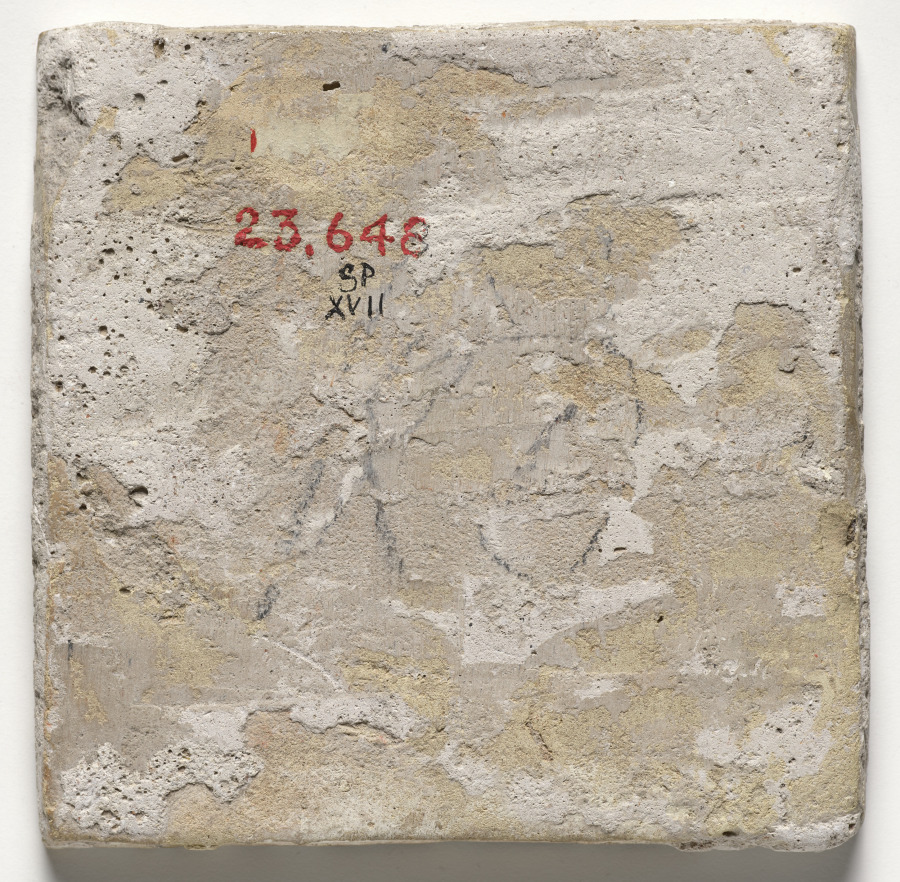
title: Wall Tile–Wild Boar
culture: Spain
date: c. 1600s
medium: glazed ceramic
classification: Ceramic